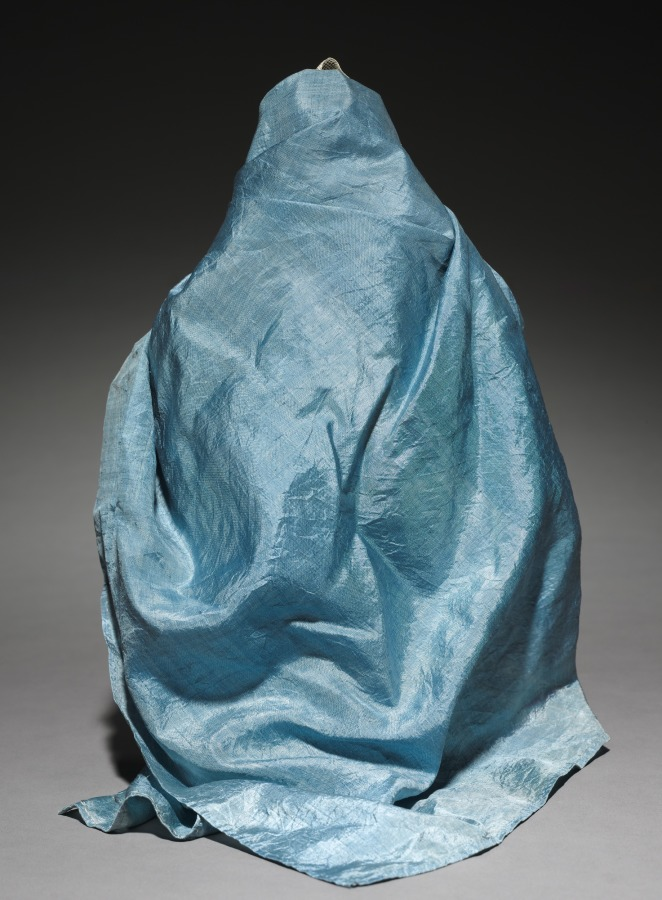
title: Figure from a Crèche: Virgin Mary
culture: Italy, Naples, late 18th-early 19th century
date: 1780–1830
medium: painted wood and terracotta with various textiles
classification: Sculpture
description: The practice of creating scenes of the Nativity for the home dates from the early 1700s in Italy, where people began to set up doll-like figures of about a foot or less in height. The custom was particularly popular in Naples around 1800, where crèche scenes (crèche means cradle, or crib) included many figures, whose heads and hands of painted terracotta, stuffed cloth bodies, and clothing adapted from contemporary local costumes gave them an amazingly realistic character. Representations of the birth of Jesus can be traced to the first few centuries of Christianity. Both living creatures and sculptural depictions of them were used from early times. By the late middle ages it was customary to create life-size figures of wood or stone, naturalistically painted, to represent the characters who participated in the events of Jesus's early life. These sculptures were then arranged in scenes illustrating one or both of the most important of these events, the Adoration of the Shepherds and the Adoration of the Magi-the three kings from the East who came to pay homage to the Christ child. Used in churches, these large figures were especially popular in Italy, Central Europe, Spain, and Portugal.